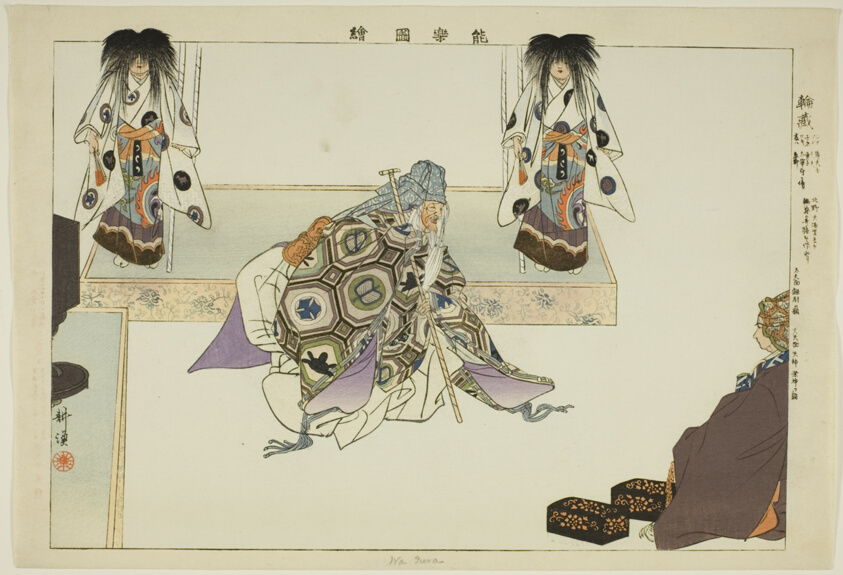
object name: Print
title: Wa Yura, from the series "Pictures of No Performances (Nogaku Zue)"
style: Japanese (culture or style)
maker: Tsukioka Kogyo; Japanese, 1869-1927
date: 1898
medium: Color woodblock print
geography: Japan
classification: woodblock print; print; asian art